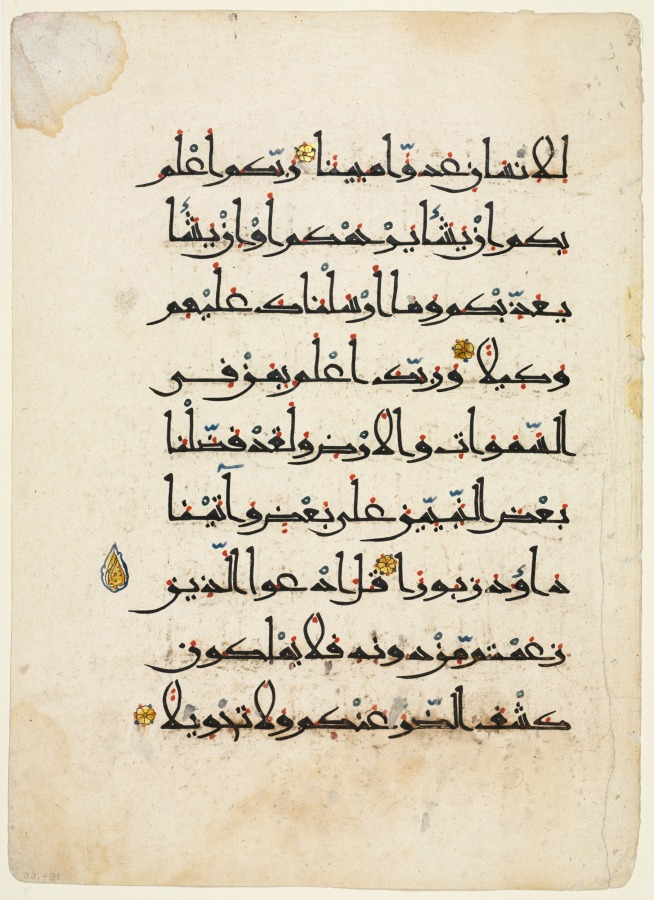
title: Leaf from a Qur'an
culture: Egypt ?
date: 1000s-1100s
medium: ink, gold, and colors on paper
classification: Drawing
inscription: Sura al-Isra' [Chapter: The Israelites] (17: part 53–56) (Arabic). Script: Eastern Kufi (nine lines to a page)